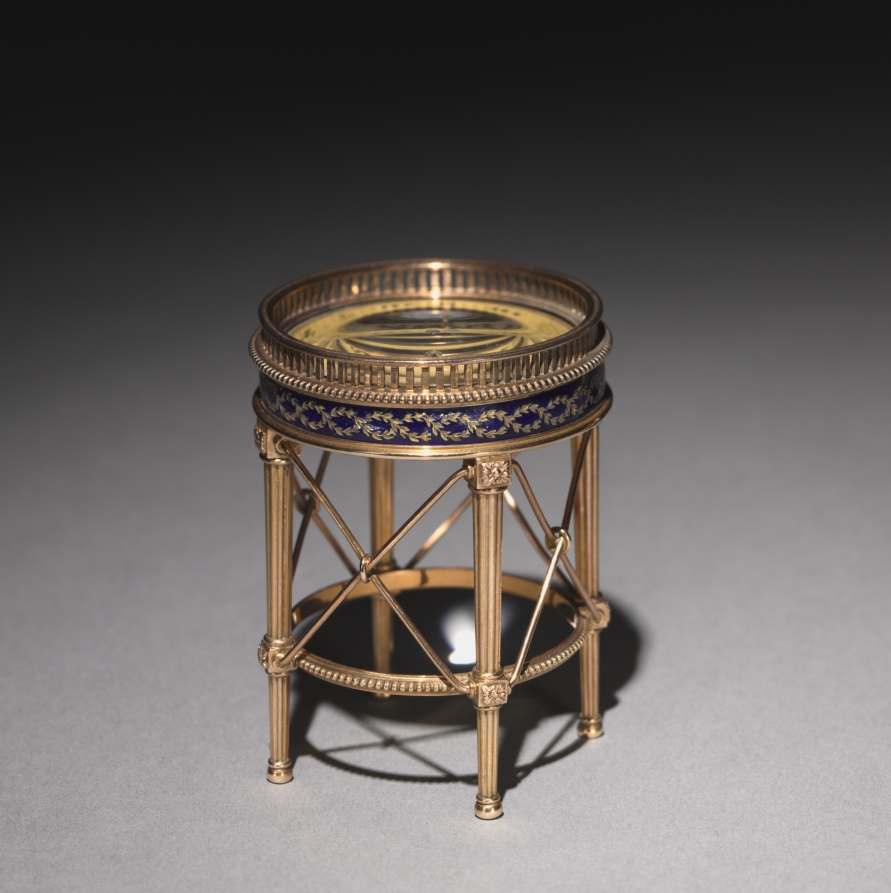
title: Miniature Table with Compass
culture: Russia, St. Petersburg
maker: House of Fabergé (Russian, 1842–1918)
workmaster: Mikhail Evlampievich Perkhin (Russian, 1860–1903)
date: c. 1890–95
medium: gold, enamel, glass, steel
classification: Miscellaneous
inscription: 56, crossed anchors [assay mark for St. Petersburg, 1882-99]; initials of workmaster Mikhail Perkhin (in Cyrillic); Fabergé (in Cyrillic).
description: The giving of small precious objects as intimate gifts between family members within the imperial court was spurred by the House of Fabergé's seemingly endless supply of bejeweled utilitarian objects decorated as expensively as possible, such as this little desk compass disguising as a miniature table in the Louis XVI taste of the late 1700s.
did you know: A small compass is concealed in the top of this miniature table for use when looking at maps.